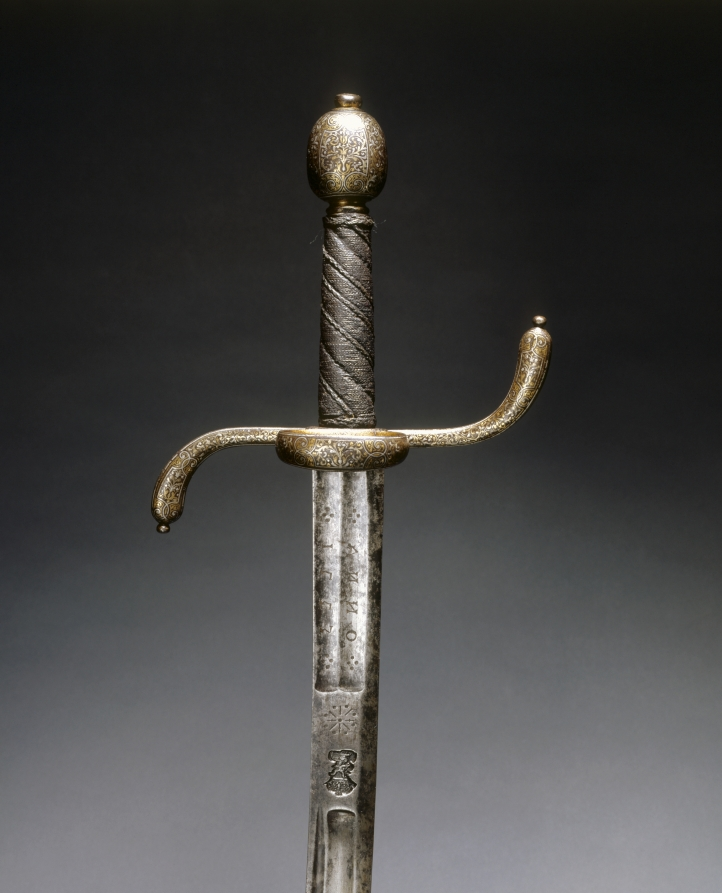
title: Hanger (Hunting Sword)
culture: Hilt: Italy (?); Blade: Germany, Saxony, late 16th-17th Century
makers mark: Jaspar Bongen the Younger (German, active late 1600s)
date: late 1600s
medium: steel; gold and silver damascened hilt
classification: Arms and Armor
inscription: "1553" (Presumed to be a commemorative date)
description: Damascening, the technique of hammering gold and silver wires into grooves cut to receive them, enlivens this sword's hilt. Further texture was added with wires to improve the user's grip, which allowed him to hunt with more control and accuracy. Hunting was a popular sport among the wealthy and many nobles owned tracts of forest, but peasants were prohibited from hunting on these lands.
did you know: The swordsmith's mark, a crowned stag visible on the blade below the hilt, is unidentified.